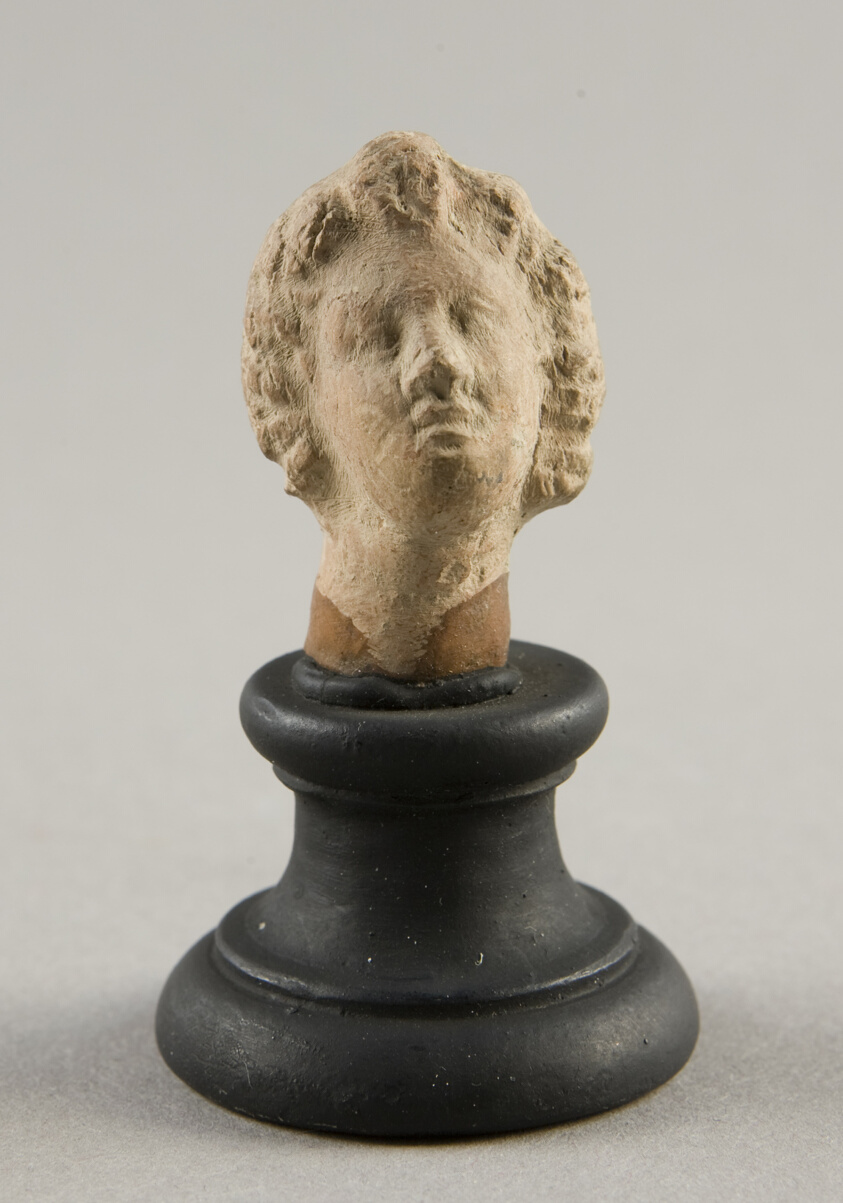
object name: Sculpture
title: Head of a Woman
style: greek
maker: Greek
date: 3rd-2nd century BCE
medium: terracotta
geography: Greece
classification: earthenware; ceramics; sculpture; ancient art